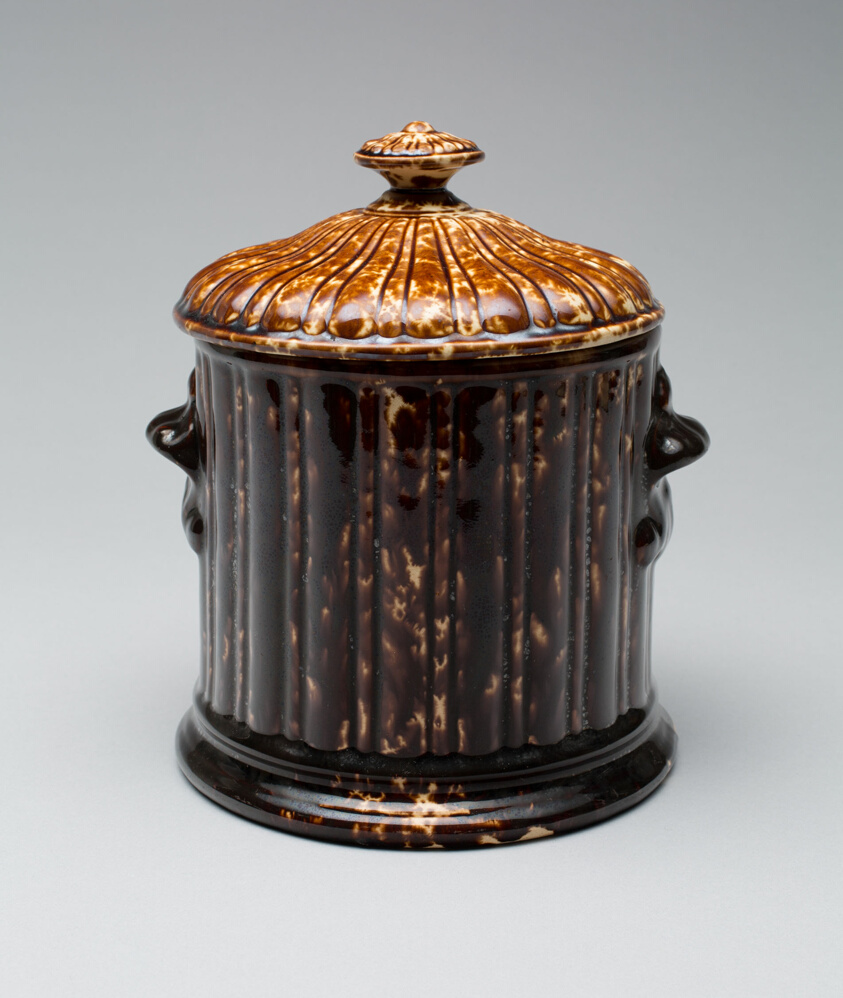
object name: Decorative Arts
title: Jar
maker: Lyman, Fenton & Company; American, 1849–52; Bennington, Vermont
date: 1849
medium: Earthenware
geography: Bennington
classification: vessel; american decorative arts; american arts; ceramics; decorative arts